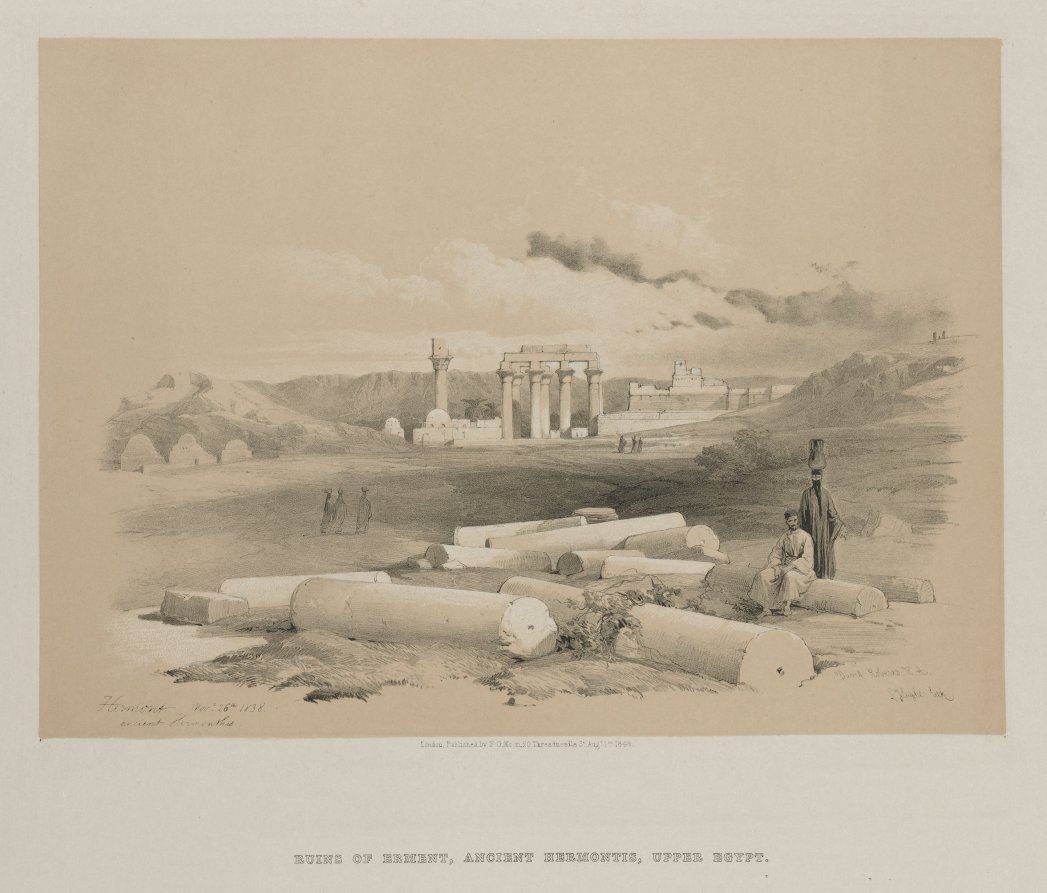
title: Egypt and Nubia, Volume II: Hermont, Ancient Hermonthis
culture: England, 19th century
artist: Louis Haghe (British, 1806–1885)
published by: F. G. Moon, 20 Threadneedle Street, London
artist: after David Roberts (Scottish, 1796–1864)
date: 1848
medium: color lithograph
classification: Print